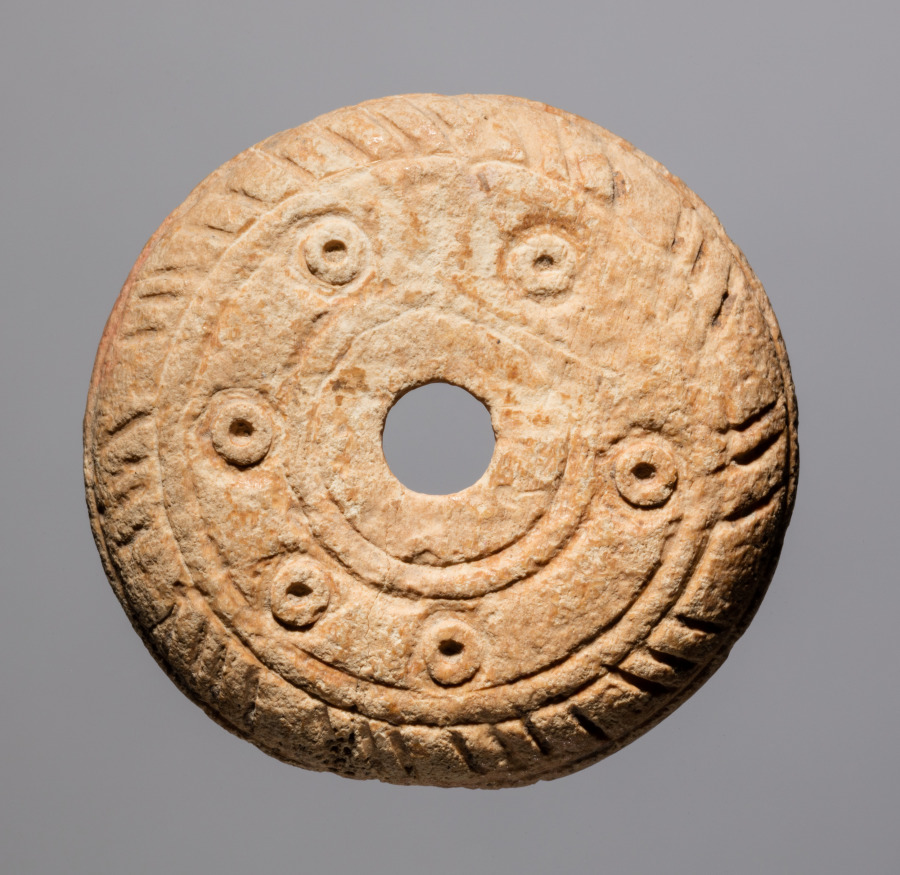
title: Spindle Whorl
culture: Iran, early Islamic period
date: 700s - 900s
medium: bone, incised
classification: Spindle Whorl